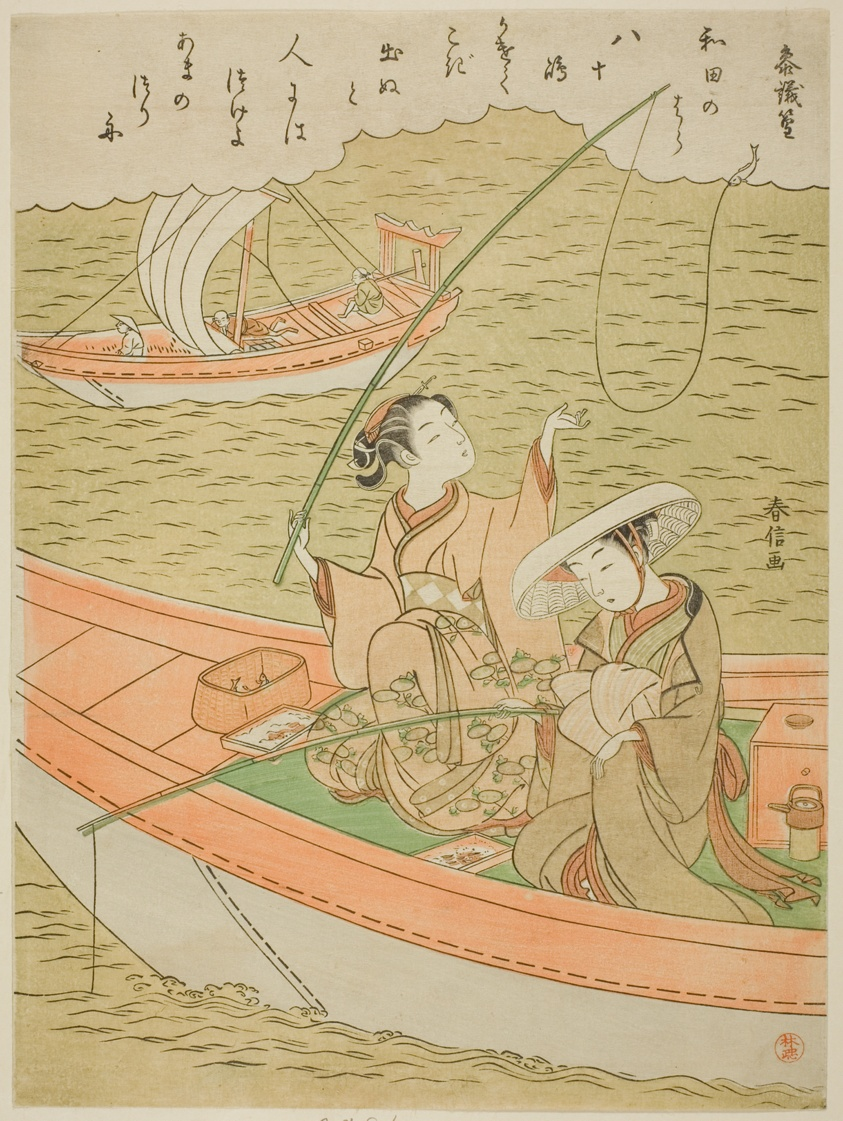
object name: Print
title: Poem by Sangi Takamura (Ono no Takamura), from an untitled series of One Hundred Poems by One Hundred Poets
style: Japanese (culture or style)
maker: Suzuki Harunobu 鈴木 春信; Japanese, 1725 (?)-1770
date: c. 1767/68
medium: Color woodblock print; chuban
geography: Japan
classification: woodblock print; print; asian art